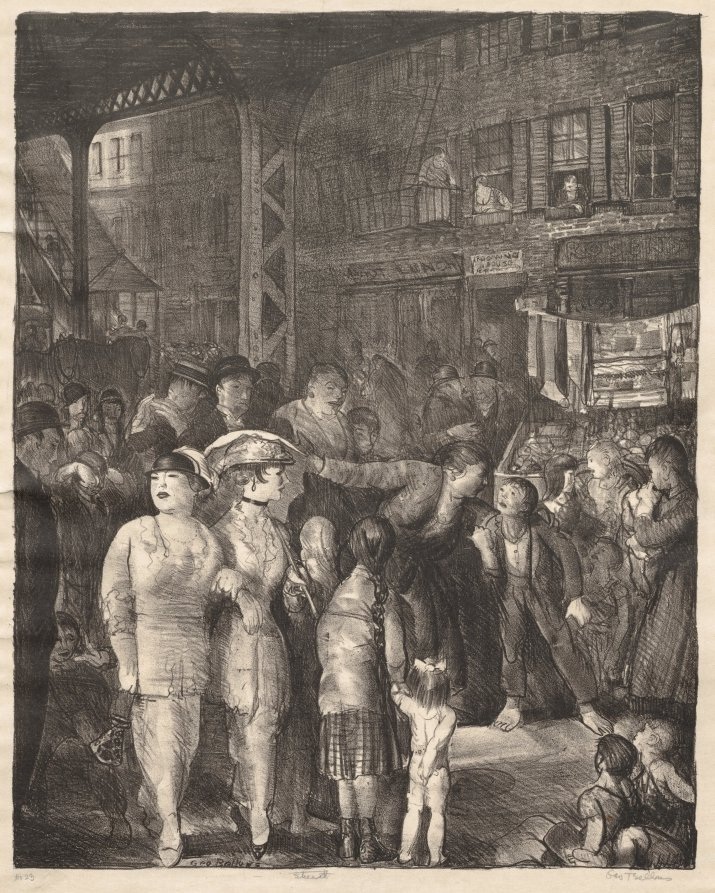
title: The Street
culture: America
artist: George Bellows (American, 1882–1925)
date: 1917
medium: lithograph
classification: Print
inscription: In graphite, lower left, recto: "No 23"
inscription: In graphite, center, recto: "Street"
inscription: In graphite, lower right, recto: "Geo. Bellows"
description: Tenement dwellers on the Lower East Side of Manhattan spent much of their time on their stoops or in the street socializing, eating, playing, or otherwise escaping their cramped living spaces. Here, the elevated train makes the crowded street feel especially claustrophobic. A woman scolds a barefoot street urchin before a curious audience in the center of the activity. In the foreground, two young women stand out in their gleaming white outfits amid the endless gray tones of the crowd. As ready-to-wear fashions became increasingly available, women of every class could go out on the town sporting the latest styles.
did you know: The Third Avenue Elevated train seen in this print, constructed in 1878, covered the length of the Bowery in New York until its closure starting in 1950.